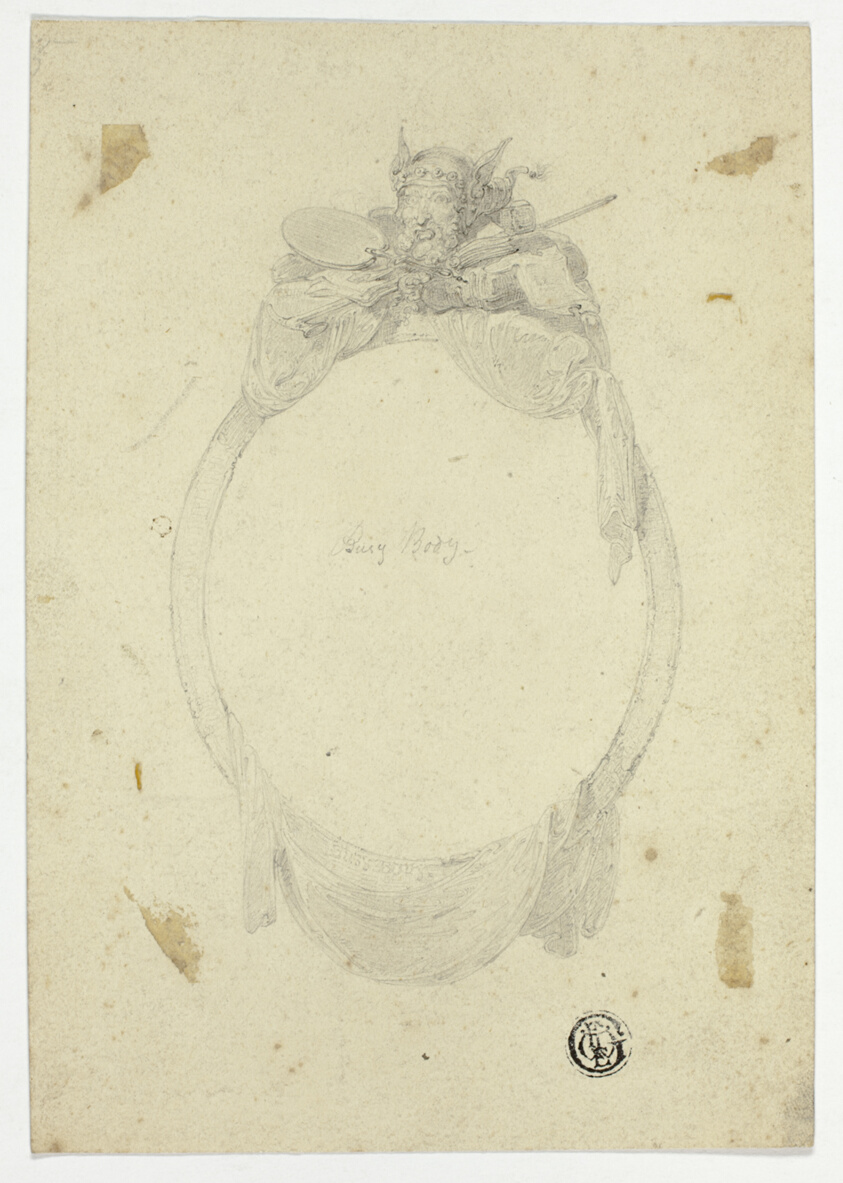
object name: Drawing and Watercolor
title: Design for a Cartouche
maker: Style of John Thurston (English, 1744-1822)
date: c. 1820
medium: Graphite on cream wove paper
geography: England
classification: graphite; drawings (visual works); prints and drawing